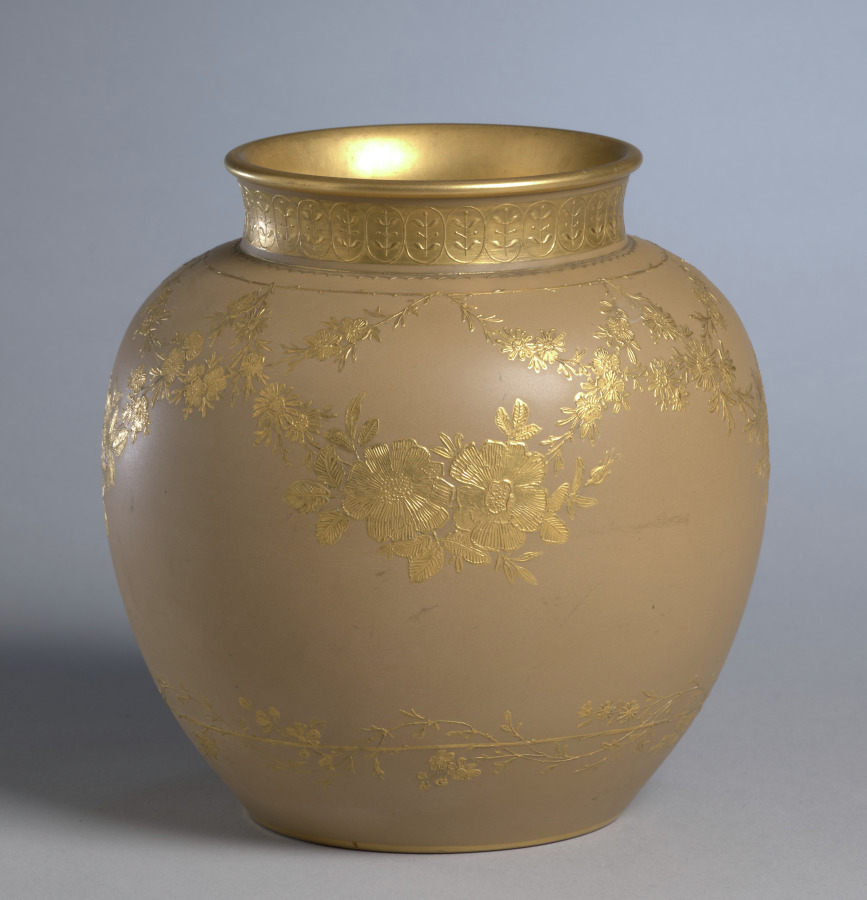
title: Vase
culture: England, late 19th Century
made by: Wedgwood Factory (British)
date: late 1800s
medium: ceramic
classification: Ceramic